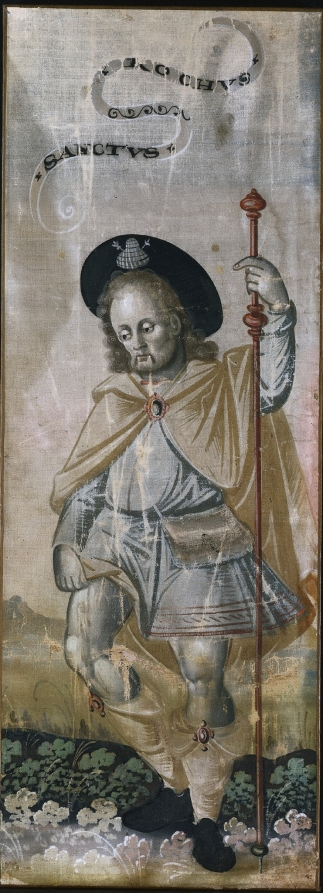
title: Saint Roch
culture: Japan, Momoyama period (1573–1615)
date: early 1600s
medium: polychromy on cloth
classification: Painting